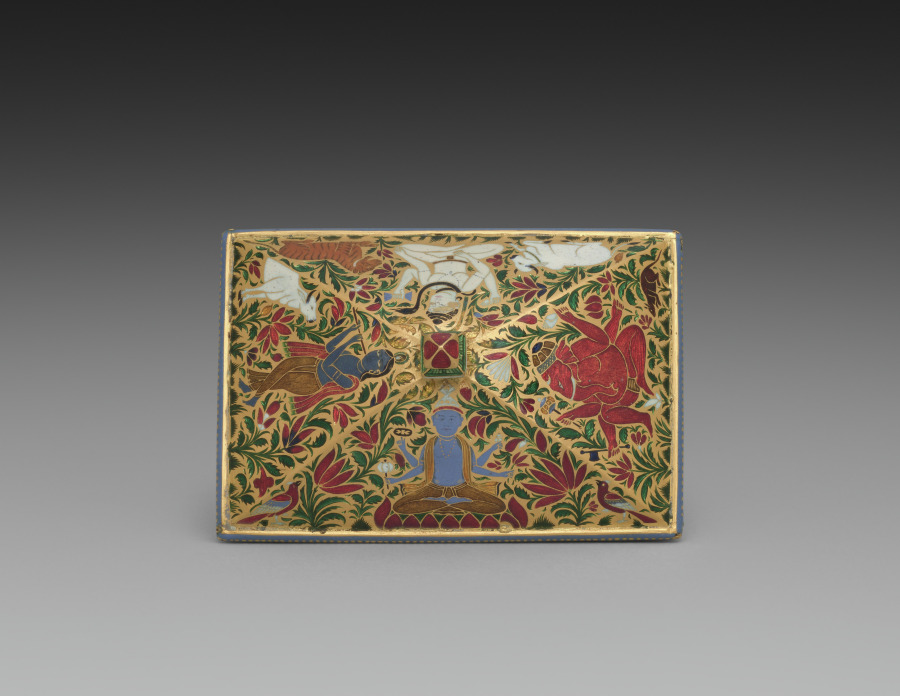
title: Cover for a Box Decorated with Shiva, Vishnu, Krishna, and Ganesha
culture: Northwestern India, Rajasthan, Rajput Kingdom of Jaipur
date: c. 1800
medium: gold with enamel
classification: Metalwork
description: This box is covered in a variety of birds, animals, and plants. The central motifs on the lids include images of four Hindu gods: Shiva, Krishna, Vishnu, and Ganesha. The blue figures are Vishnu and Krishna, the latter of which is an incarnation of the former who is shown playing a flute. The elephant-headed Ganesha is red and accompanied by his mount, the bandicoot rat Dinka. The four-armed Shiva is paired with two animals, including a tiger and his sacred bull mount Nandi. Small enamel boxes could be used to house many different substances, from cosmetics to spices to stimulants, including opium and paan, a digestive typically given at formal gatherings as a sign of the host’s hospitality.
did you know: Ganesha’s mount is the rat by his left knee.